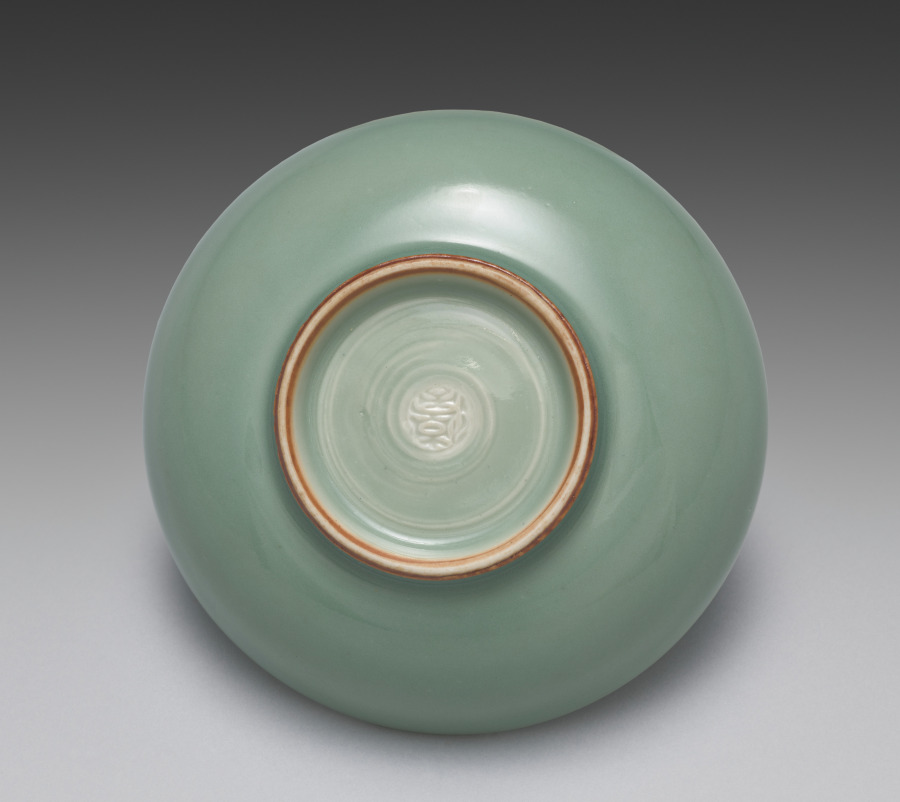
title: Dish from Dishes with Ivy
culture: Japan, Meiji period (1868–1912)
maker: Seifū Yohei III (Japanese, 1851–1914)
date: 1893–1914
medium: One from a set of five dishes; porcelain with green glaze and molded designs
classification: Ceramic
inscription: 清風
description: Yohei III’s main output for his sophisticated clientele was in the form of tea sets and dining sets. He often produced in pairs, sets of five, or sets of ten. This set of five dishes with a green glaze and designs of ivy vines in very low relief has unfortunately lost its box. These dishes are slightly larger than the other dishes, like CMA 2022.187, and so may have been not saucers but rather small plates for meals.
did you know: In his career, Seifū Yohei III created a range of dishes in green glazes.